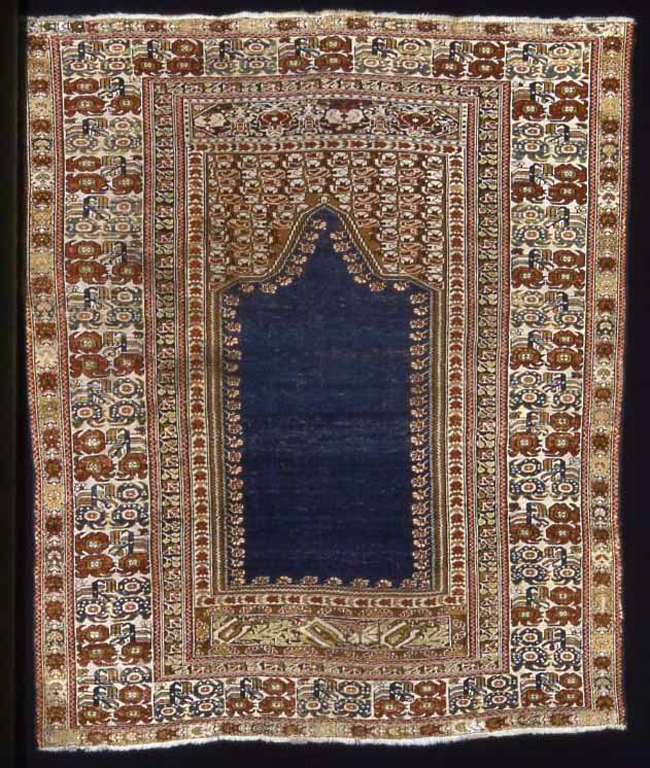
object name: Textile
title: Prayer Carpet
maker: Turkey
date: 1875/1900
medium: Wool and cotton, plain weave with supplementary wrapping wefts forming cut pile through a technique known as "Ghiordes knots"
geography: Turkey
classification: weaving - carpet; textile